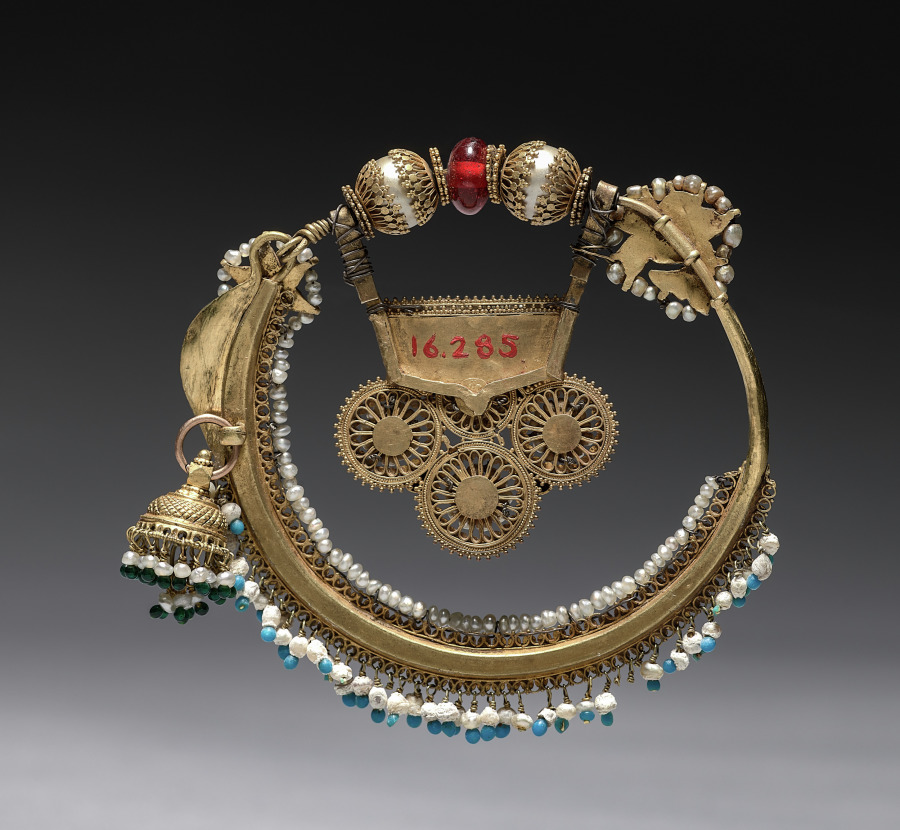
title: Nose Ring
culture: India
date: 1800s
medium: silver gilt with stones and beads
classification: Jewelry